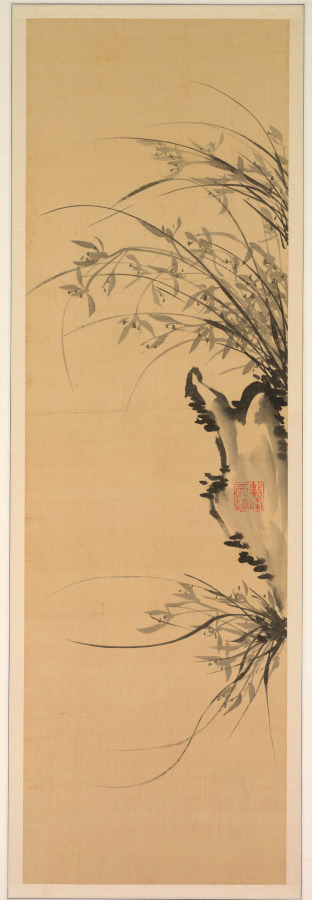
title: Orchids and Rocks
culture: Korea, Joseon dynasty (1392–1910)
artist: Yi Ha-eung (Korean, 1820–1898)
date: 1897–98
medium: Eight-panel folding screen; ink on silk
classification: Painting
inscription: Translation: [I] painted for the high minister Yangwon. [I] humbly request your corrections and advice [on my painting]. [By] an eighty-year old gentleman of rocks.)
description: Yi Ha-eung (1820−1898), the artist of this eight-panel folding screen, was one of the most influential men in late 19th-century Korea. Acting as the regent for his son, King Gojong (1852−1919), who ascended the throne at the age of thirteen, Yi ruled Korea from 1866 to 1873. In addition to his illustrious political career, Yi was also recognized as one of the most celebrated artists who led the revival of literati art in late 19th-century Korean art. In particular, he was recognized as the master of orchids, one of the “Four Gentlemen” (plum, orchid, chrysanthemum, and bamboo) themes. Solely relying on monochrome ink, Yi depicted the curvilinear silhouettes of cymbidium orchid leaves dramatically hanging down from cliffs. Growing in wilderness and redolent with fragrance, orchids were often associated with the perseverance of principled gentlemen, and thus became one of the most popular subjects of scholar-artists' paintings.On the upper right corner of the far left panel, Yi wrote a short inscription stating that he painted the work at the age of 80.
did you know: The artist of this elegant painting is the formidable politician Yi Ha-eung (1820–1898), who is known for a seclusion policy that aimed to protect Korea and its sovereignty from foreign influences.